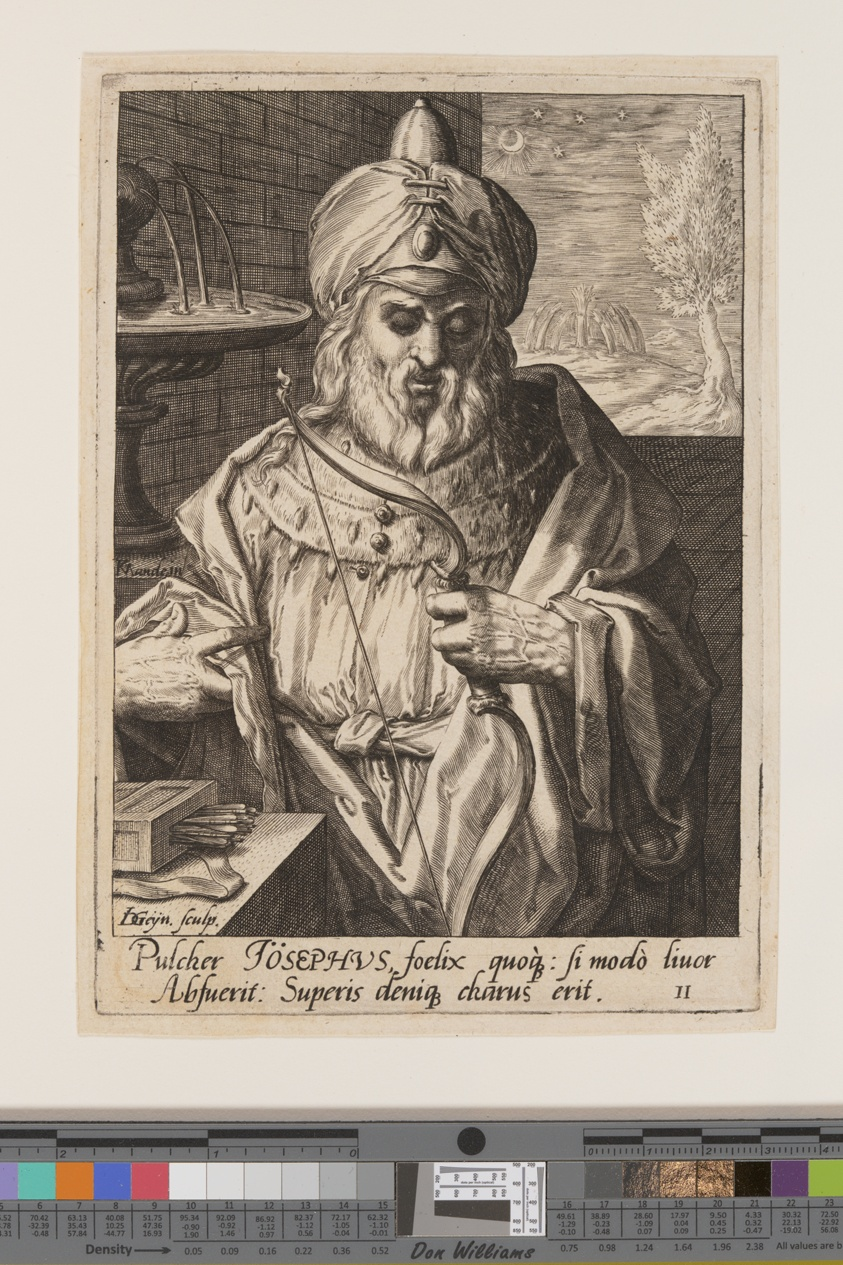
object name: Print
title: Joseph, from The Twelve Sons of Jacob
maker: Jacques de Gheyn II (Dutch, 1565–1629); after Karel van Mander (Dutch, 1548–1606)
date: c. 1589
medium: Engraving on ivory laid paper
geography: Netherlands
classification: engraving; paper; print; prints and drawing